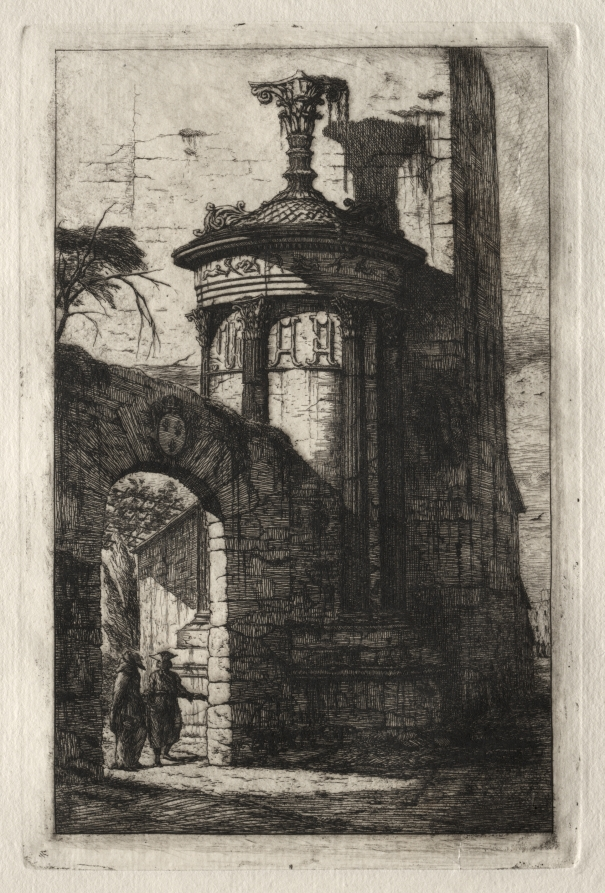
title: Entrance to the French Capuchin Convent at Athens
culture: France, 19th century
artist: Charles Meryon (French, 1821–1868)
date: 1854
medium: etching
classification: Print